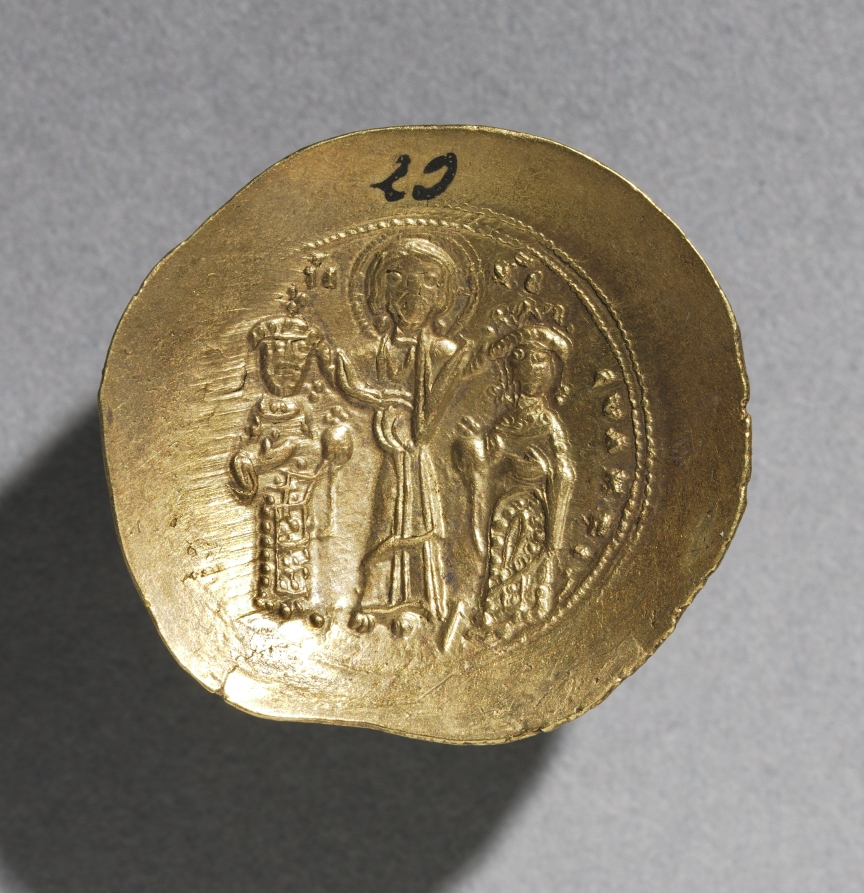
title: Nomisma with Eudocia and Romanus IV Diogenes (obverse)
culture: Byzantium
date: 1068–1071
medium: gold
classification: Coins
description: Byzantine Gold Coins The vast number of surviving Byzantine coins attests to the level of trade across the empire. Controlled and supervised by the emperor, the producers of coins took care to represent his authority and reflect his stature. Talented artists were recruited to engrave the dies (molds) used for the striking of coins. Emperors increasingly came to include their heirs and co-emperors on their coinage, as well as other family members or even earlier rulers. Coins were recognized, then as now, as small, portable works of art. With their inscriptions and images, Byzantine coins provide valuable documentation of historical events and a record of the physical appearance of the emperors. The coins shown here include the solidus, the basic gold coin of 24 karats; the tremissis, a gold coin of one-third the weight and value of the solidus; and the nomisma, which in the 10th century replaced the solidus as the standard gold coin.